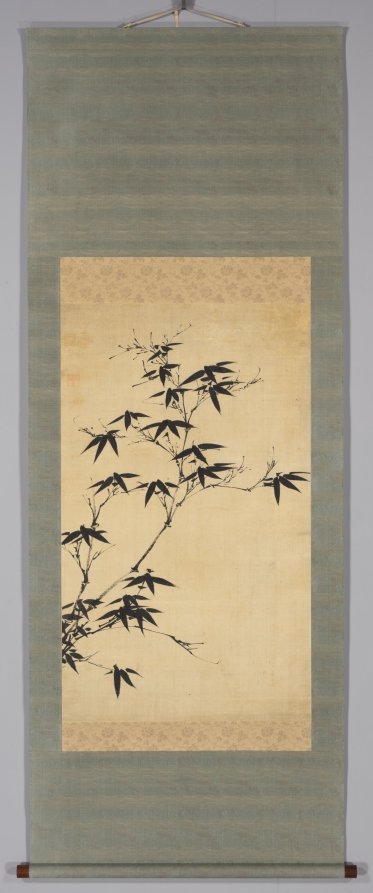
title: Bamboo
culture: Korea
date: 1900s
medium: hanging scroll; ink on silk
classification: Painting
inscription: With spurious seal of Yi Chong (1541-1622)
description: As one of the four symbols called "Four Gentlemen ( 四君子),” along plum blossoms, chrysanthemum, and orchids, bamboos represent strength, both physical and mental.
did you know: This work is modern imitation of the famous 17th-century literati painter Yi Jeong known for his bamboo painting in ink. Yi's original work is the collection of the Metropolitan Museum of Art (https://www.metmuseum.org/art/collection/search/50486).